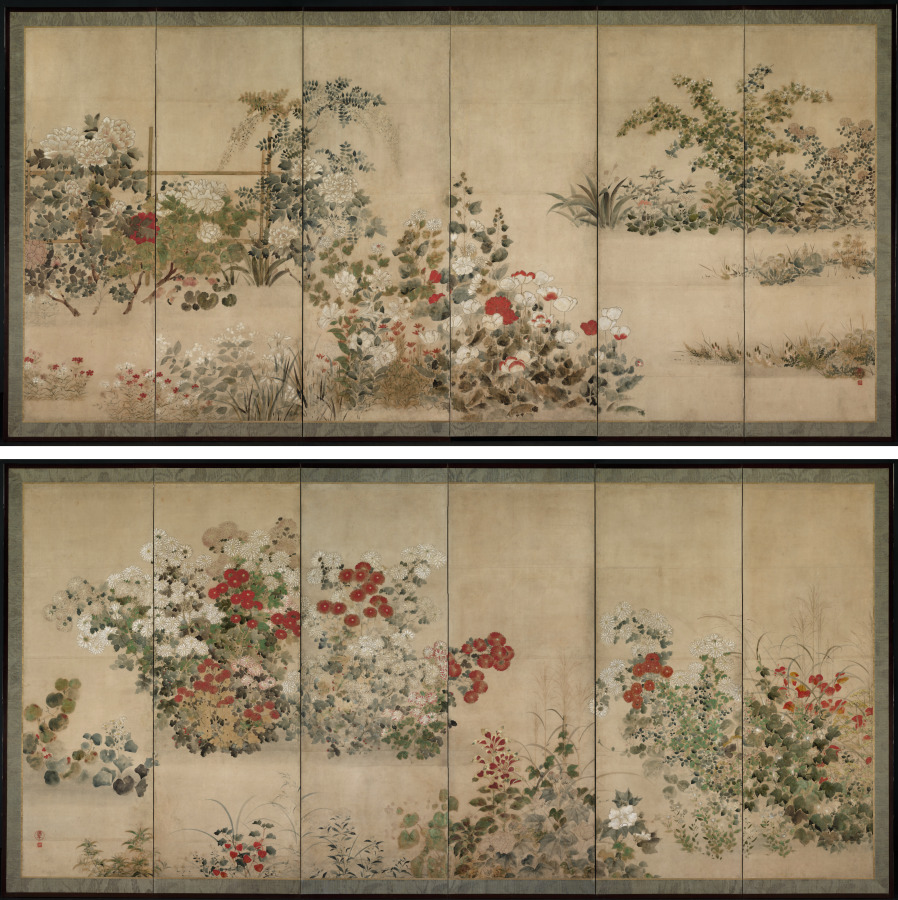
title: Flowers and Grasses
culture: Japan, Edo period (1615–1868)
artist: Kitagawa Sōsetsu (Japanese, active 1639–50)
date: mid-1600s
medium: Pair of six-panel folding screens; ink and color on paper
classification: Painting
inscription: two seals, lower left: "I-nen; Sosetsu"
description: Kitagawa Sōsetsu painted for the Maeda family, powerful rulers of what is present-day Ishikawa Prefecture on the central northern coast of Honshū, Japan’s main island. Screens served as room dividers and backdrops in Maeda grand residences. This composition is considered one of the artist’s masterpieces. Kitagawa Sōsetsu is thought to have been a student of Tawaraya Sōsetsu, who was in turn the student of Tawaraya Sōtatsu the Kyoto-based master painter regarded as the creator of the style that came to be known as Rinpa. By selecting a painter of this lineage, the Maeda family consciously connected their aesthetics to those of the imperial capital as a means of proclaiming their elevated status.